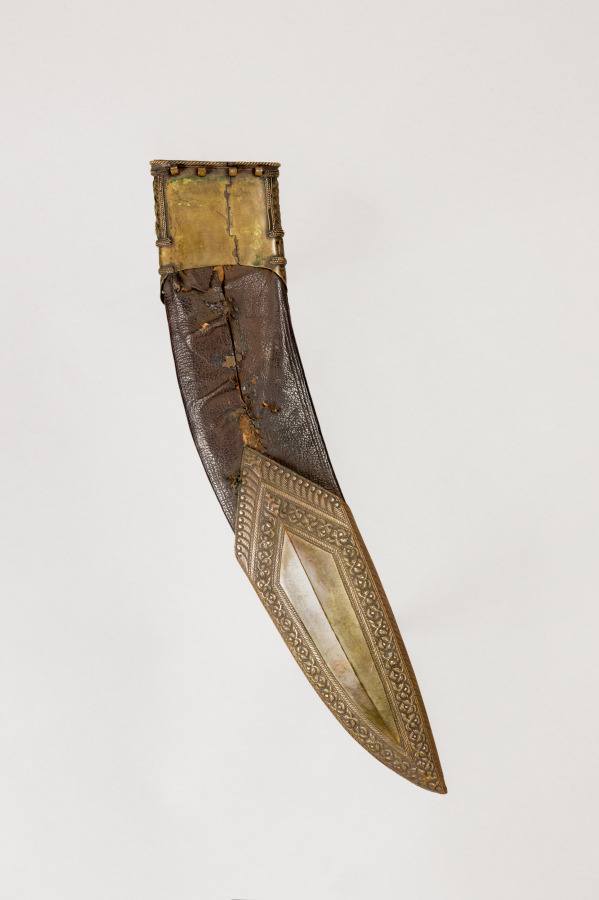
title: Scabbard for Knife (Kukri)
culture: Nepal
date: c. 1750–1800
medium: steel with etched surface and wooden handle, leather covered scabbard with brass mounts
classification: Arms and Armor